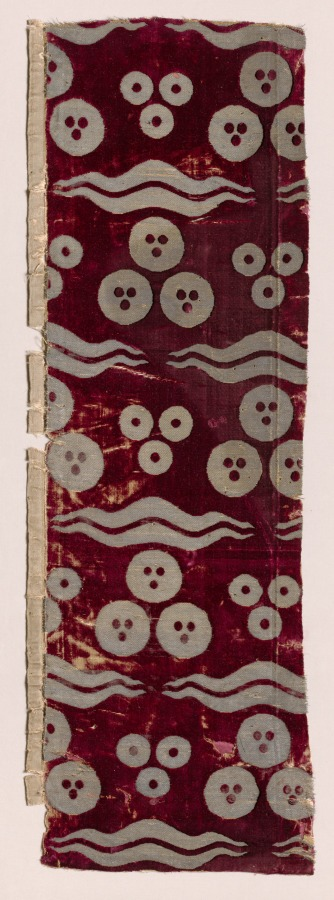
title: Brocaded velvet with chintamani design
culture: Turkey, Bursa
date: late 1400s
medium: velvet, brocaded: silk and silver-metal thread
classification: Velvet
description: This early Ottoman brocaded velvet was woven in an imperial workshop in the prosperous city of Bursa, the silk capital and major commercial center of the Ottoman Empire. It has exceptionally rich crimson silk pile, almost twice as dense as later monochrome velvets. The brocaded pattern of three balls and paired wavy bands is known as chintamani, derived from the Sanskrit word for a popular Buddhist motif, “the three jewels,” shown surrounded by flames or foliage in Buddhist art across Asia. Based on the high frequency of its use in art for the Islamic court of the Ottoman Turks, it appears to have been a favored motif and possibly even an unofficial imperial emblem.